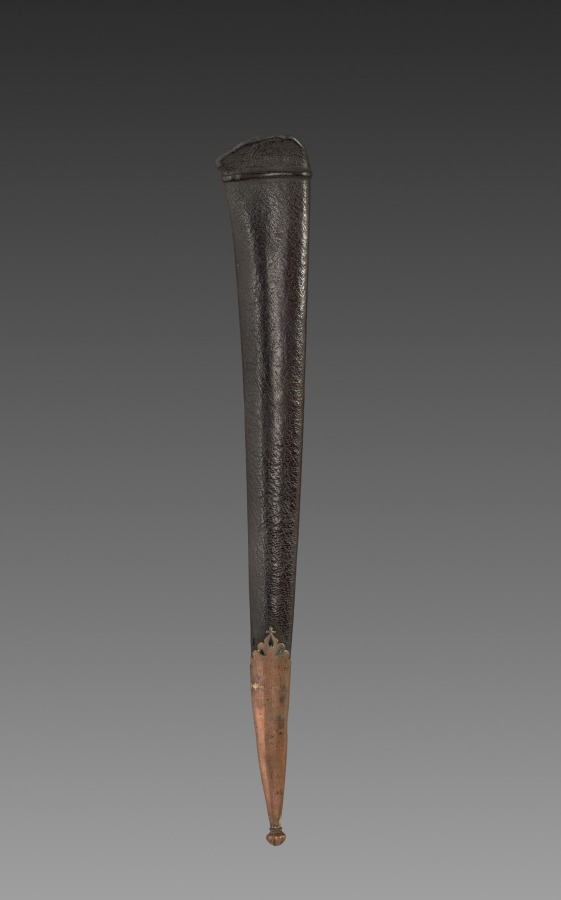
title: Dagger (brown leather case)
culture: India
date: 1700s–1800s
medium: silver inlay and leather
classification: Arms and Armor